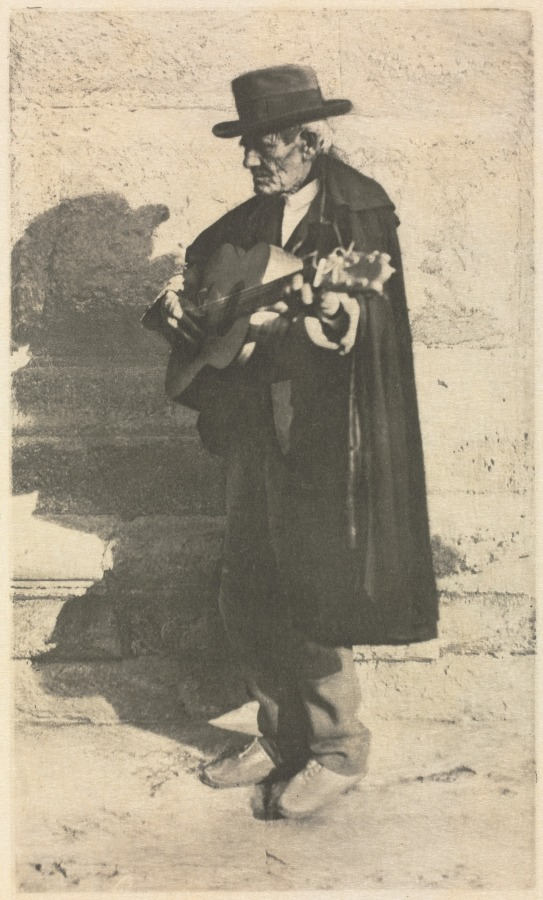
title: Camera Work: A Blind Musician - Granada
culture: England, 20th century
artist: J. Craig Annan (British, 1864–1946)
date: 1914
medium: photogravure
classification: Bound Volume